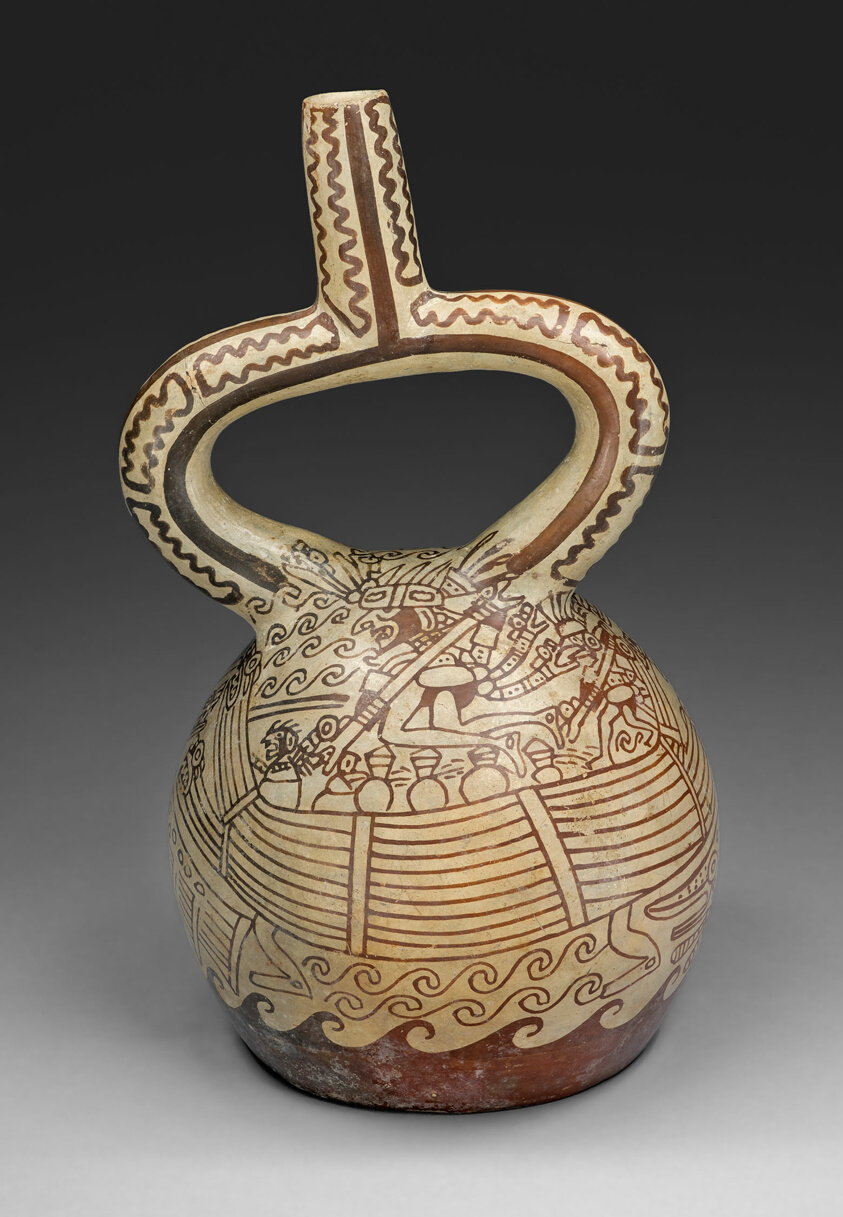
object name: Vessel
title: Stirrup Vessel with Fineline Painting Depicting a Figures in Reed Boat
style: moche, mochica v, mochica, early intermediate period, Pre-Columbian, americas, Arts of the Americas, andean, andes, south american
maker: Moche (North coast, Peru)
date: 100 BCE–500 CE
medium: Ceramic and pigment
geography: Peru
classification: earthenware; ceramics; vessel; art of the americas